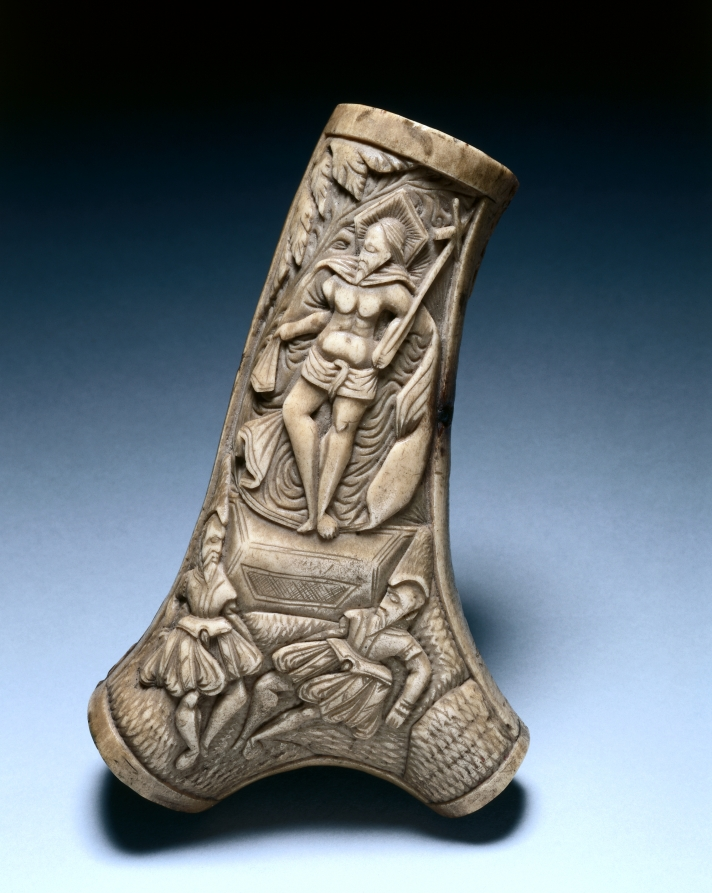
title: Powder Flask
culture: Germany, late 16th Century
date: c. 1580–1600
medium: staghorn with carved relief decoration; mounts missing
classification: Arms and Armor